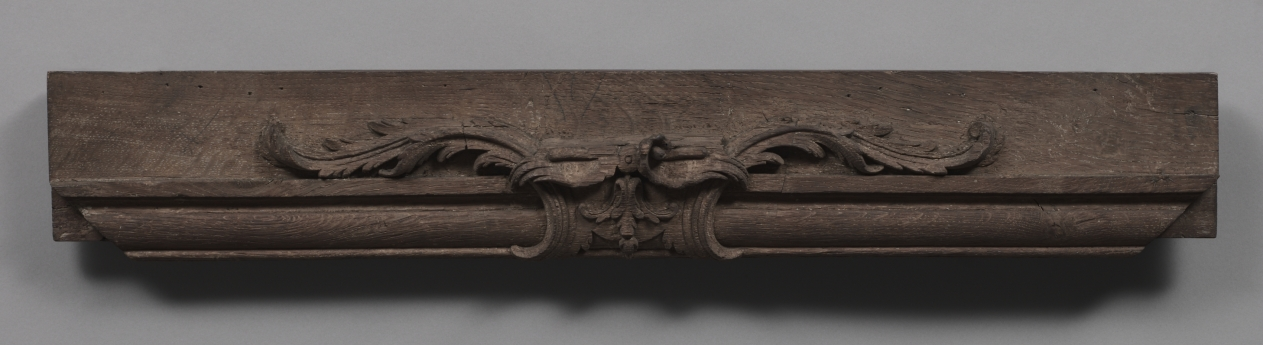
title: Panel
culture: France, Regency Period, 18th Century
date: 1715–1723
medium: wood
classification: Furniture and woodwork